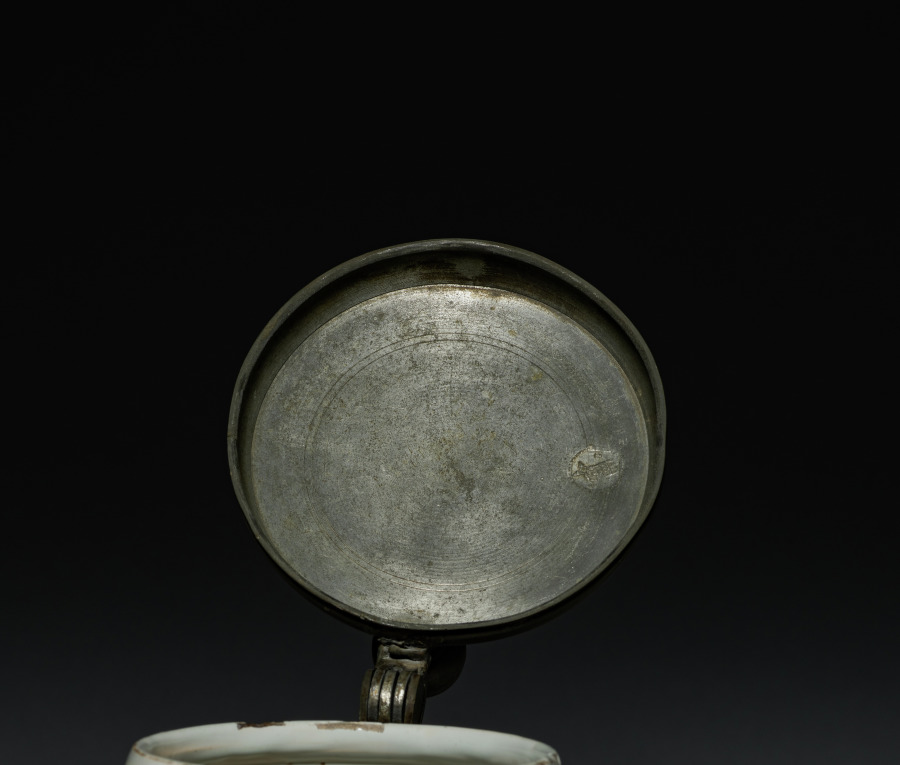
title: Tankard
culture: Germany, Aumund (Vegesack), 18th century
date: c. 1750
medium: faience with pewter cover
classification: Ceramic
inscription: inscribed on pewter cover: "Johan/Grother" (probably name of first owner).